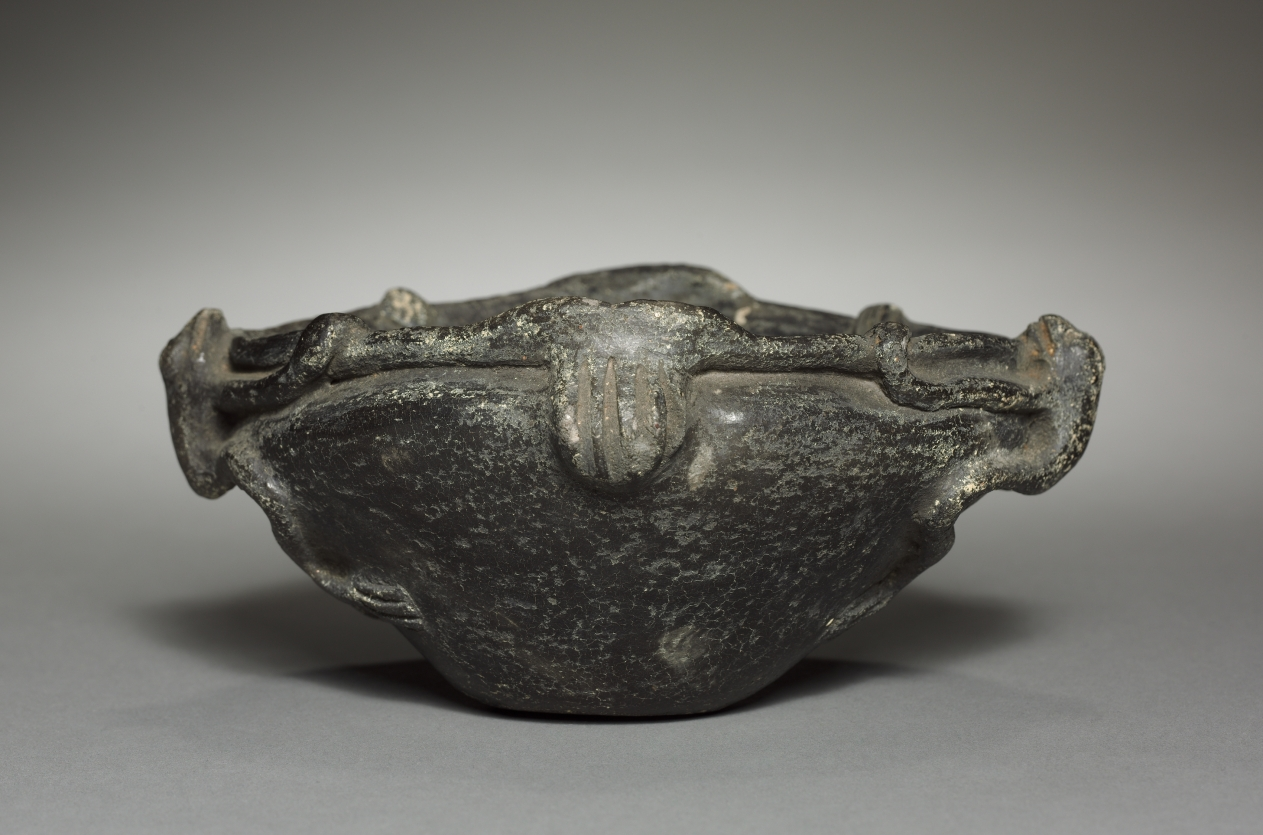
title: Bowl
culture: Colombia, 19th-20th century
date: before 1921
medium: black ware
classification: Ceramic